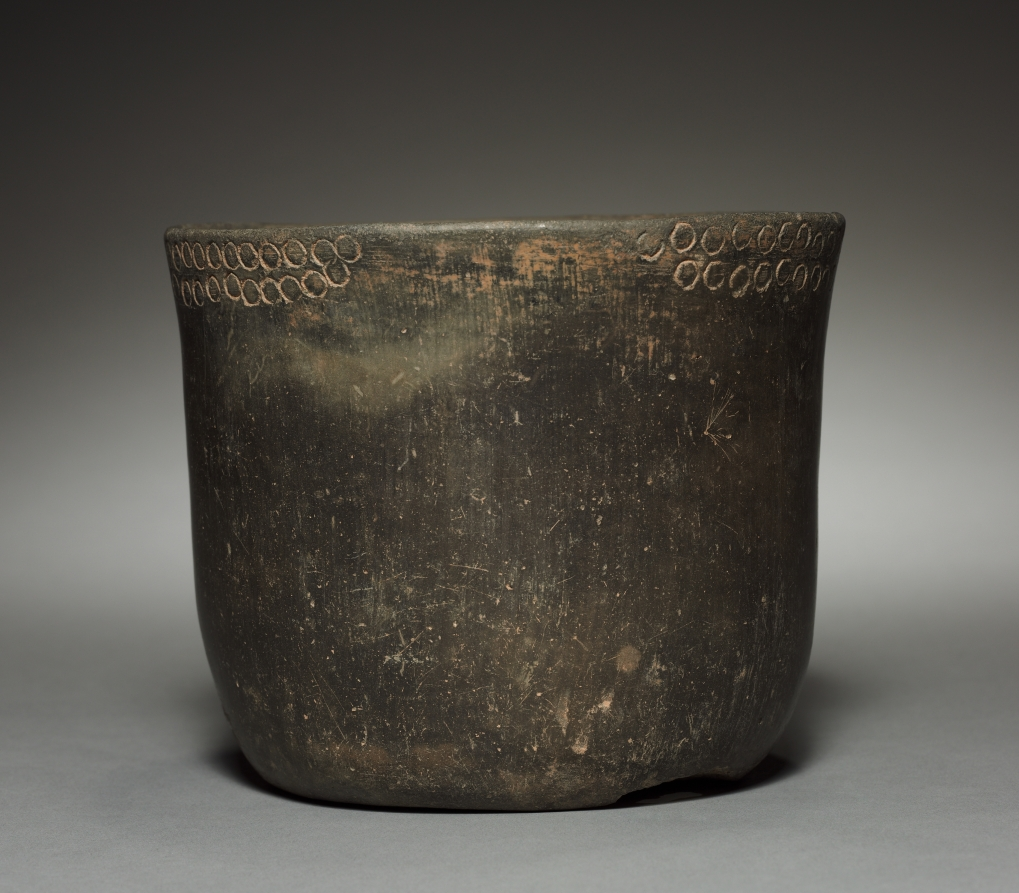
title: Drinking Vessel with Handle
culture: Argentina, Cienga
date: c. 600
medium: earthenware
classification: Ceramic